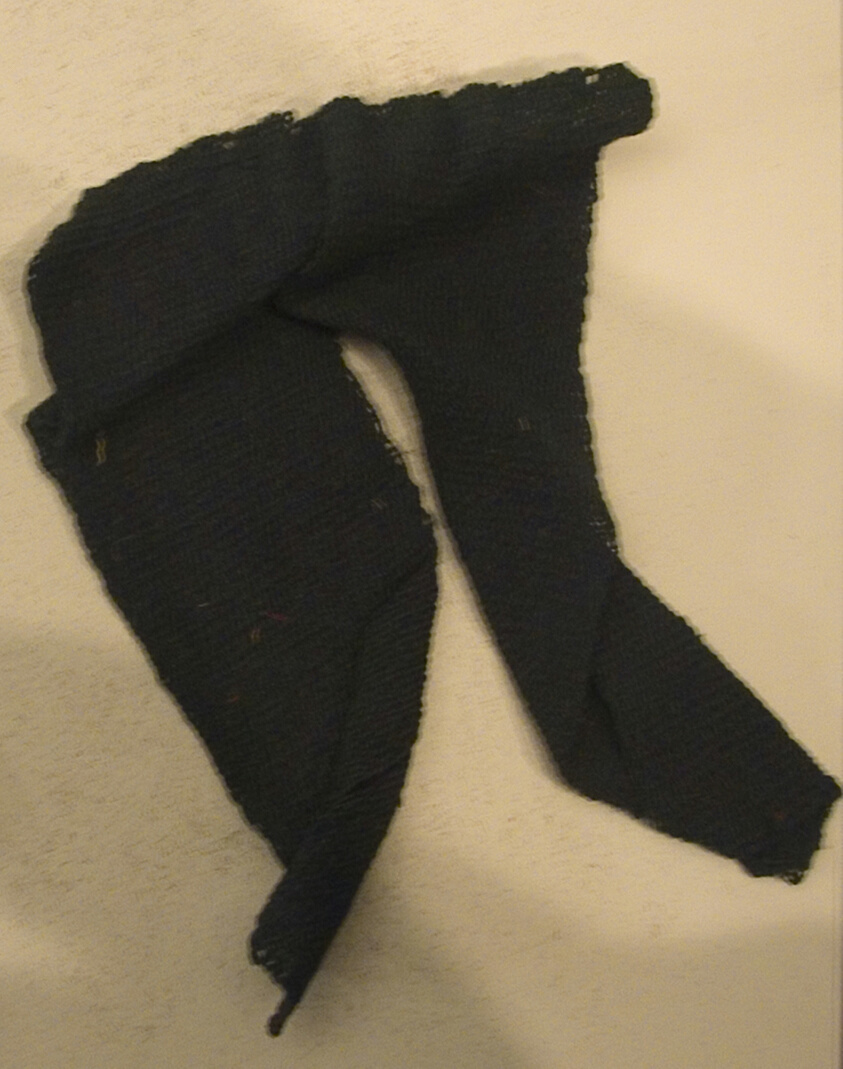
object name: Textile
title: Fragment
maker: Peru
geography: Peru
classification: textile; weaving